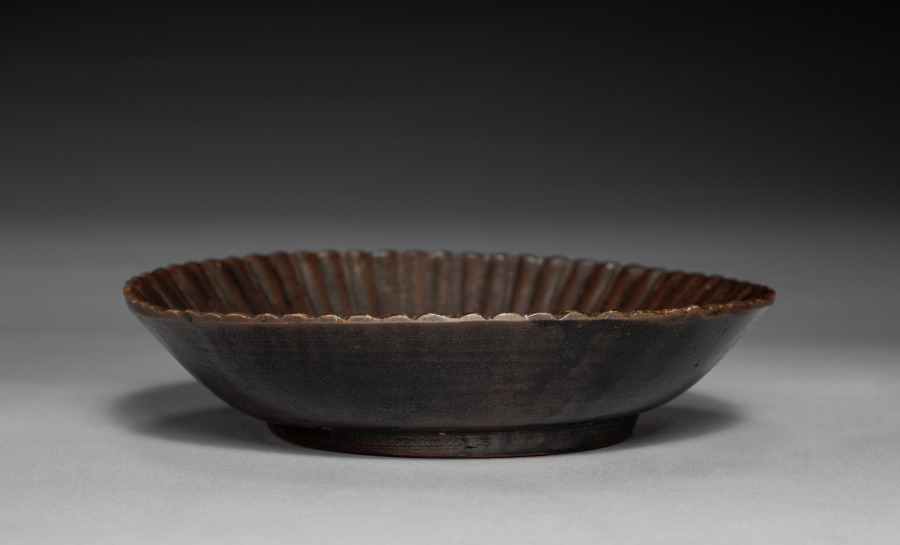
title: Dish with Maple Leaf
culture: Japan, Edo period (1615–1868)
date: 1650–99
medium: porcelain with underglaze blue and iron glaze (Hizen ware, Suisaka type)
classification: Ceramic